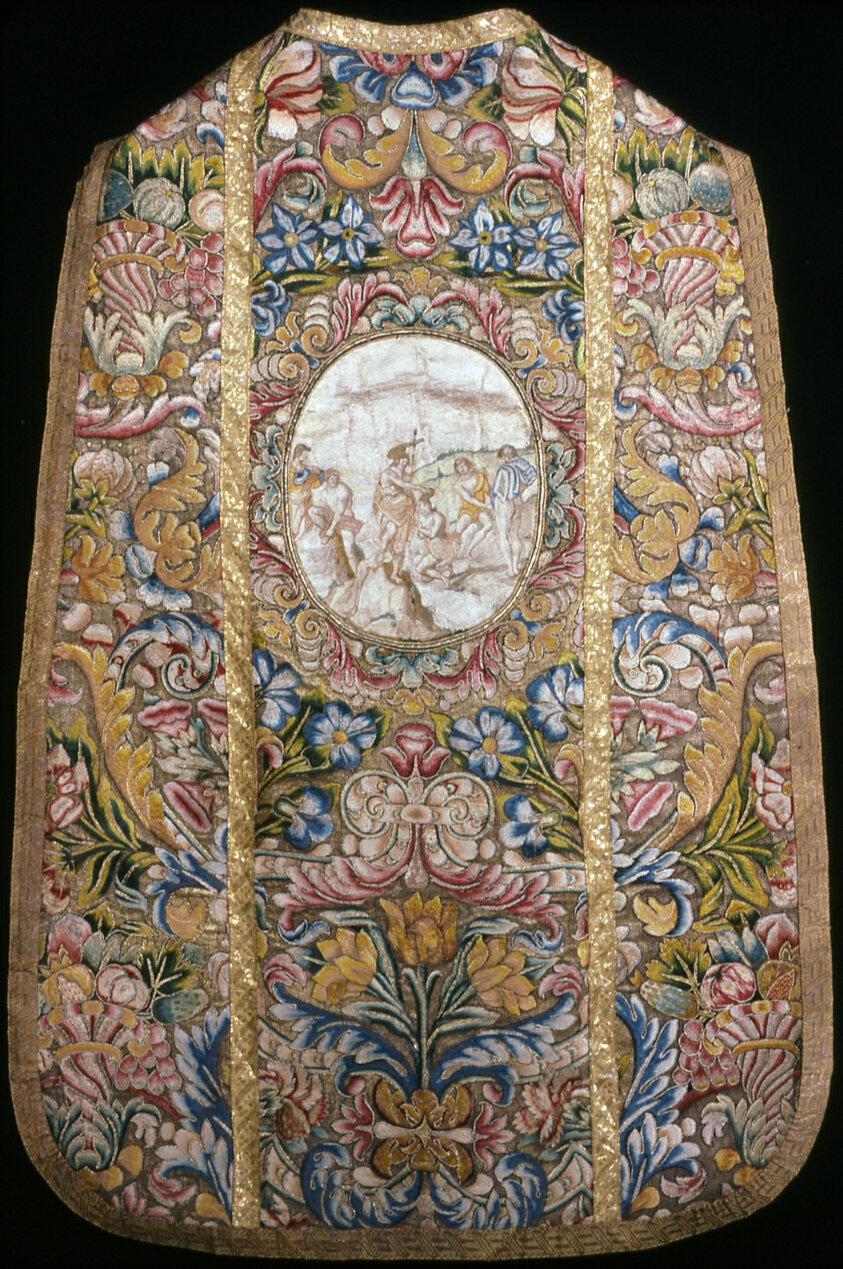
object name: Textile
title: Chasuble with Medallion Depicting John the Baptist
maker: After a fresco by Andrea del Sarto (Italian, 1486–1530) (Tondo only); Italy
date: 1575/1625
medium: Linen, plain weave underlaid with silk, plain weave with insert medallion of silk, warp-float faced satin weave; embroidered with silk and gilt- and silvered-metal-strip-wrapped silk and linen in satin, split and stem stitches; couching and French knots; edged with silk and gilt-metal-strip-wrapped silk, plain weave with patterning wefts and complementary weft weave tapes; lined with silk, plain weave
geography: Italy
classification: textile; liturgical; needlework (visual works)